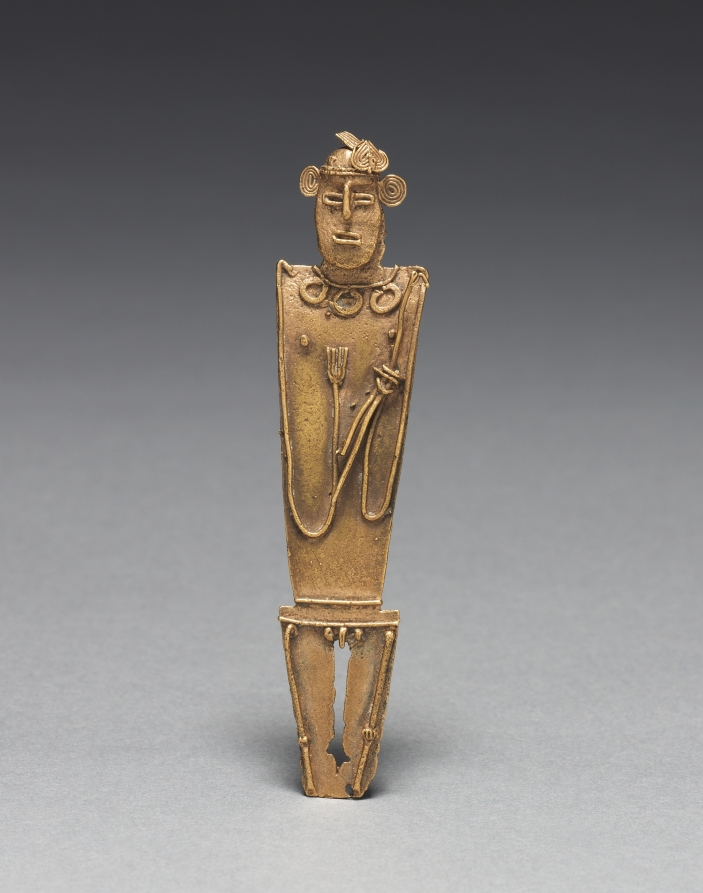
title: Tunjos (Votive Offering Figurine)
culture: Colombia, Muisca style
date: c. 900–1550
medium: cast gold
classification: Metalwork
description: Unlike the other gold ornaments made in the isthmian region, tunjos were not worn; instead, they served as offerings that were deposited in sacred places such as lagoons and caves. They often depict humans who hold something. Perhaps because they were not meant for display, tunjos were not finished after lost-wax casting. Flaws remain uncorrected, surfaces are unpolished, and gold that backed into the channel used to pour the molten metal into the mold was left in place.